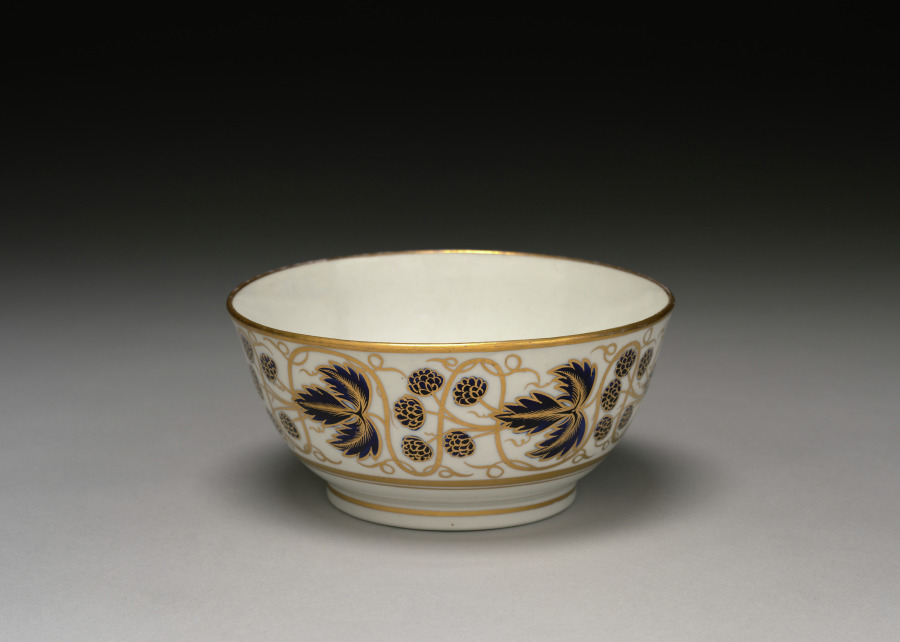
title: Bowl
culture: England, late 18th century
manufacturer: Worcester Porcelain Factory (British, established 1751)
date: late 1700s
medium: porcelain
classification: Ceramic